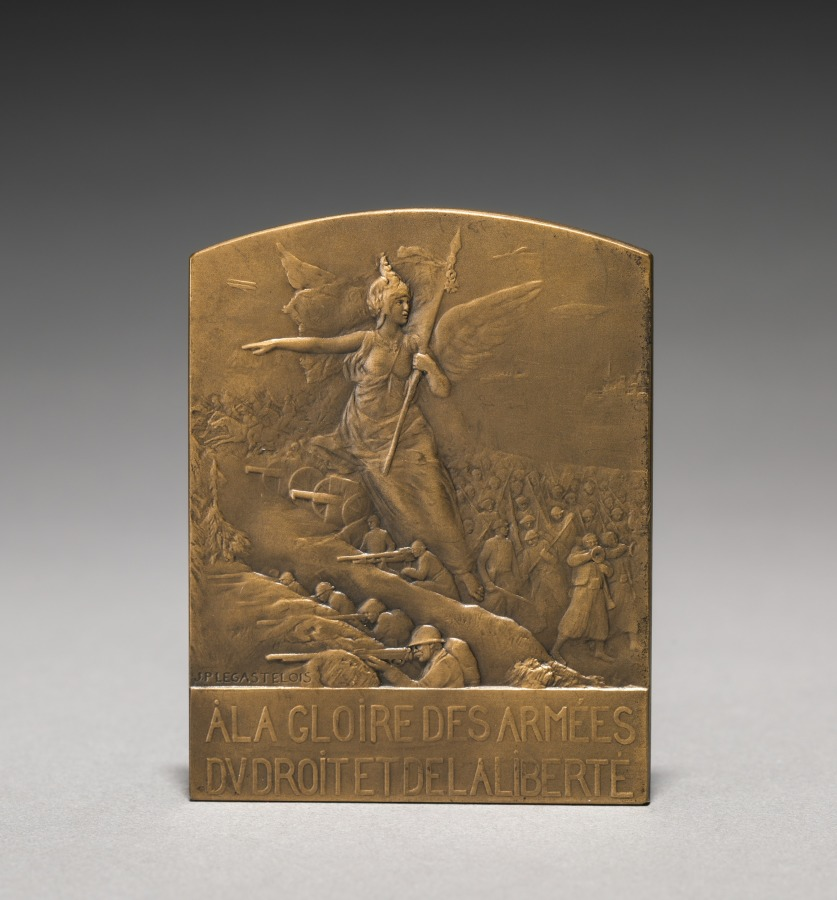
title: Medallion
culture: France, 20th century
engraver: Jules Prosper Legastelois (French, 1855–1931)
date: 1917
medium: bronze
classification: Metalwork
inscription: "La Victoire Restaure le Droit."